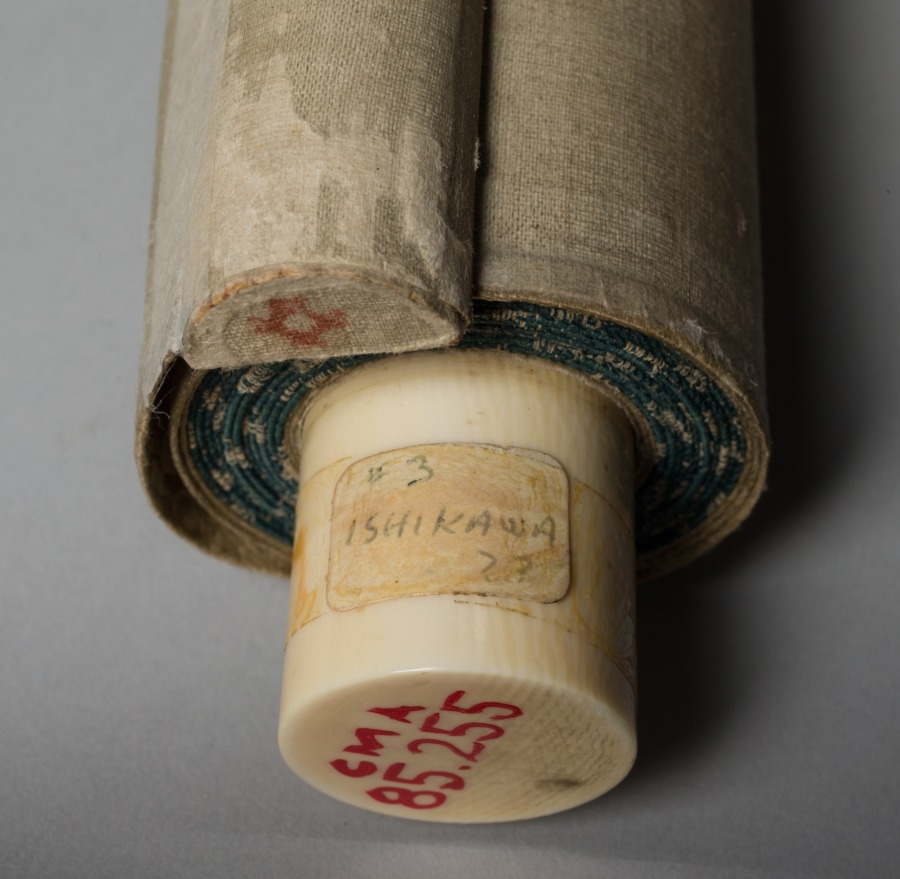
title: Courtesan and Attendants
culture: Japan, Edo period (1615–1868)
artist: attributed to Engetsudō (Japanese)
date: c. 1748–51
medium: hanging scroll; ink and color on paper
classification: Painting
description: The courtesan wears a pair of tall, lacquered wooden clogs and heavy robes, indicating it is winter. The elaborate span of her tortoiseshell comb in her fashionable coiffure enhances her glamorous appearance. Her blue-and-white striped obi is tied in a loose bow in front, typical for her profession. The round, stylized cherry blossom crest of her "house" (brothel), partially visible on her shoulder just above the shawl, also appears on the robes of her two attendants (kamuro). The attendants hold shuttlecocks, used in a game associated with New Year celebrations. One girl stares out at the viewer; the other looks back. The frontal view of the attendant’s face is somewhat rare in ukiyo-e painting and prints.